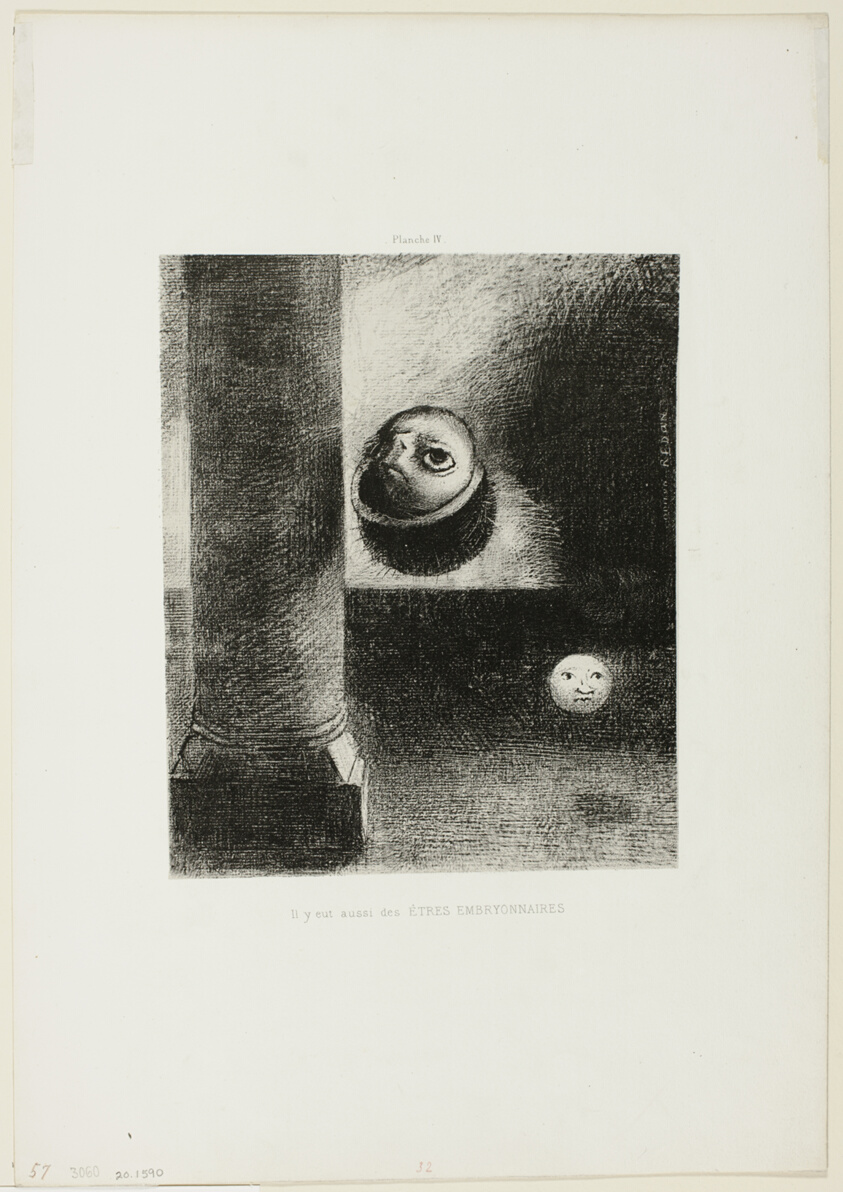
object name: Print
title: There Were Also Embryonic Beings, plate 4 of 6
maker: Odilon Redon (French, 1840-1916)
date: 1885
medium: Lithograph in black on cream China paper laid down on ivory wove paper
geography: France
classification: lithograph; print; prints and drawing; paper